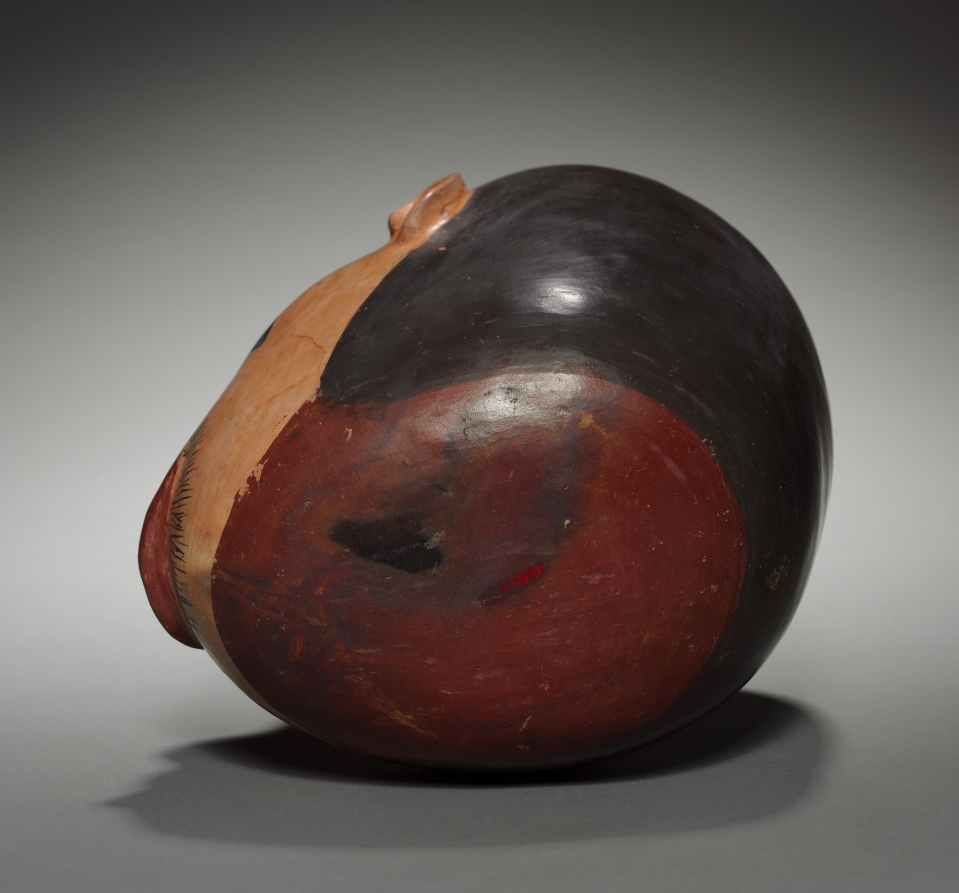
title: Severed Head Effigy Vessel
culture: Peru, South Coast, Nasca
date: c. 100–350 CE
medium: earthenware with colored slips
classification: Ceramic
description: The Nasca people were organized politically into small, competing chiefdoms, and warfare was common. This vessel represents a freshly severed human head (probably that of a captured and sacrificed prisoner) with staring eyes, gaping mouth, and blood-red underside. Modeling of the mouth cavity, tongue, and teeth lends the image a startling realism. Human sacrifice by decapitation was a central element of Nasca religion, essential to agricultural fertility. Severed heads were emptied and dried, then pierced through the forehead and suspended from a thick cord. Such preserved heads have been recovered from offering deposits and from tombs, where they were buried with their captors.